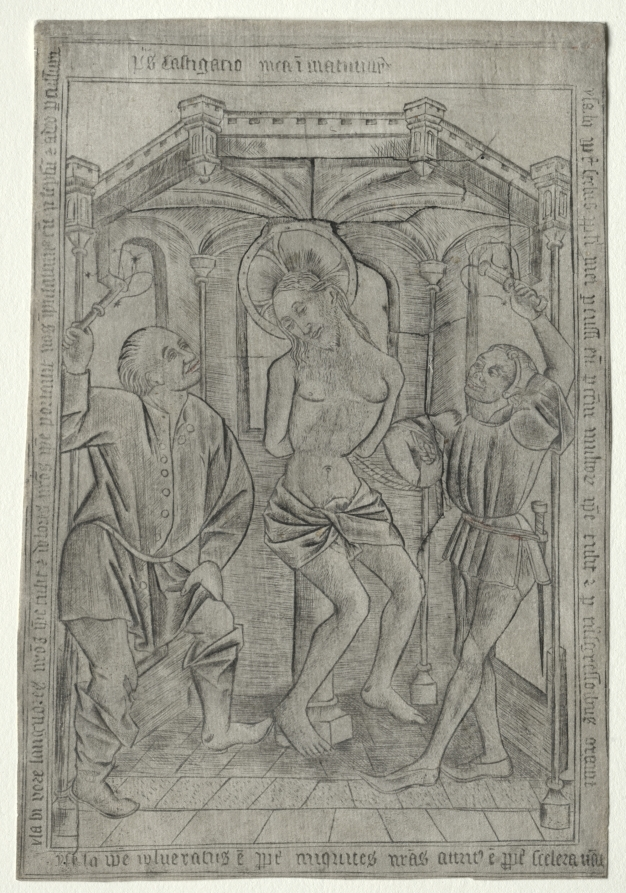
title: The Passion: The Flagellation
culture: Netherlands, 15th century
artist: Master of the Banderoles (Netherlandish, active about 1450–75)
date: c. 1450–75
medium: engraving with traces of hand coloring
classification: Print